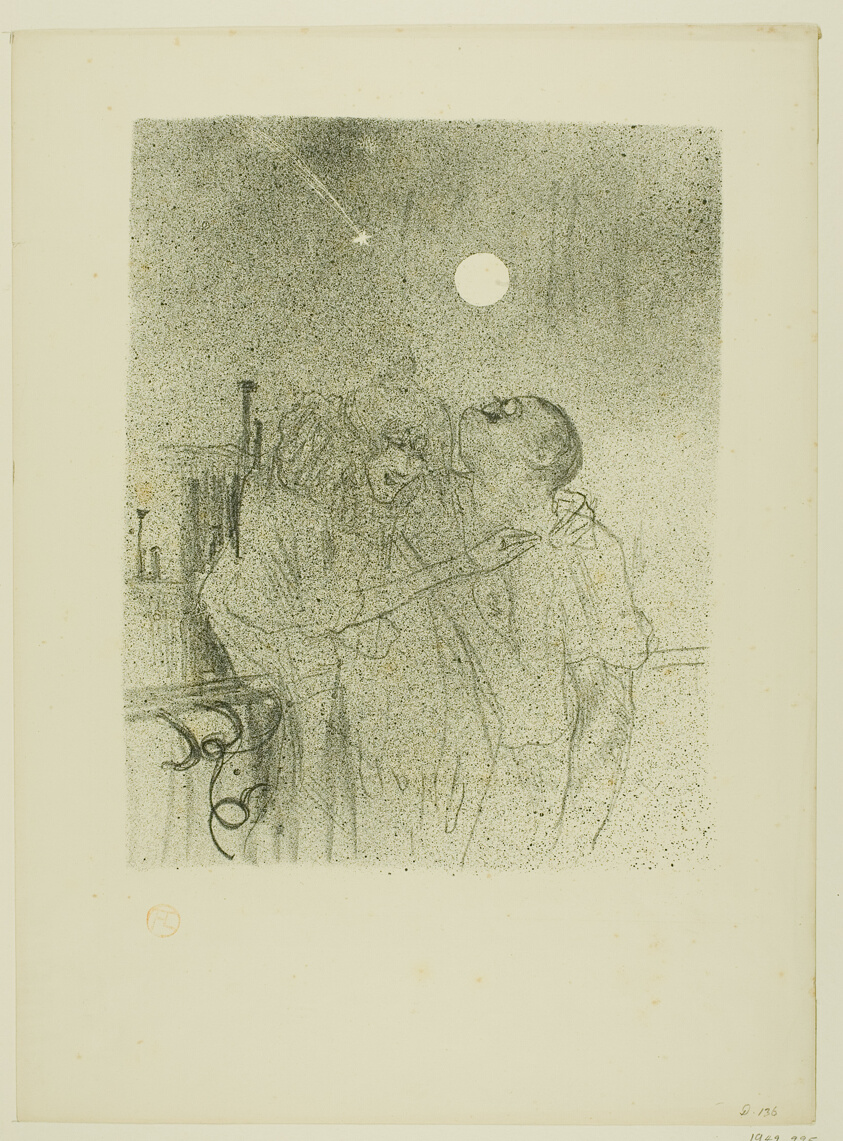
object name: Print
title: Shooting Stars, from Mélodies de Désiré Dihau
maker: Henri de Toulouse-Lautrec (French, 1864-1901)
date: 1895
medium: Lithograph on cream wove paper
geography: France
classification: lithograph; print; prints and drawing